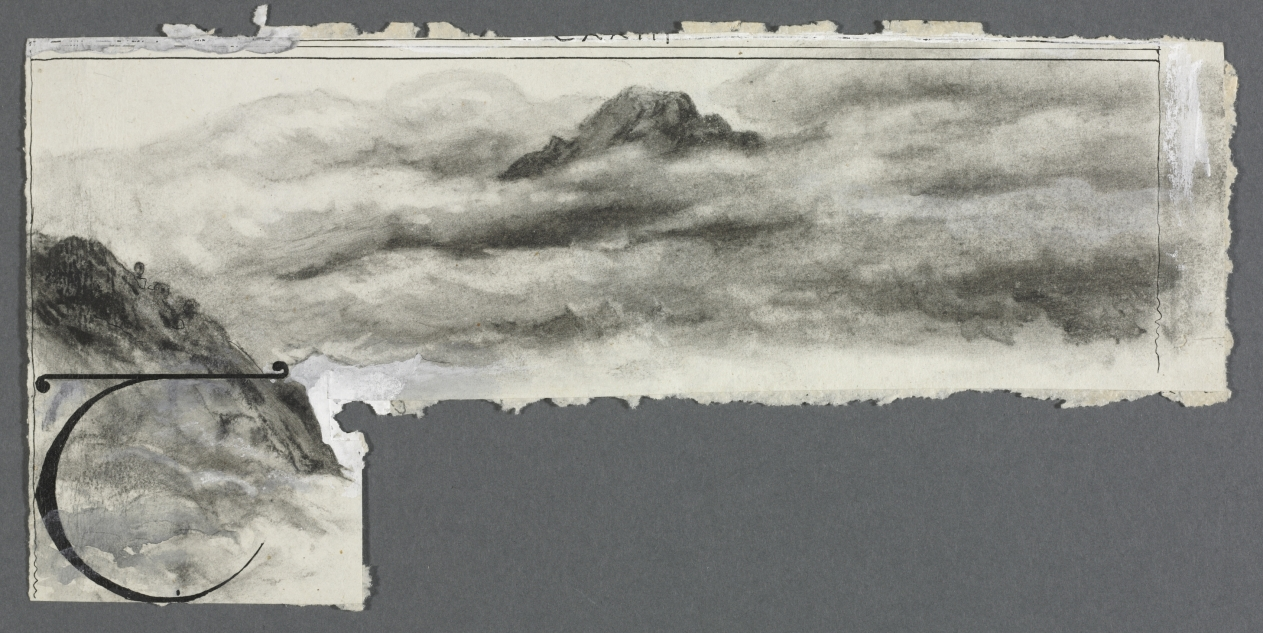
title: Landscape with Mist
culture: America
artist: Harry Fenn (American, 1838/45–1911)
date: before 1897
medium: wash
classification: Drawing